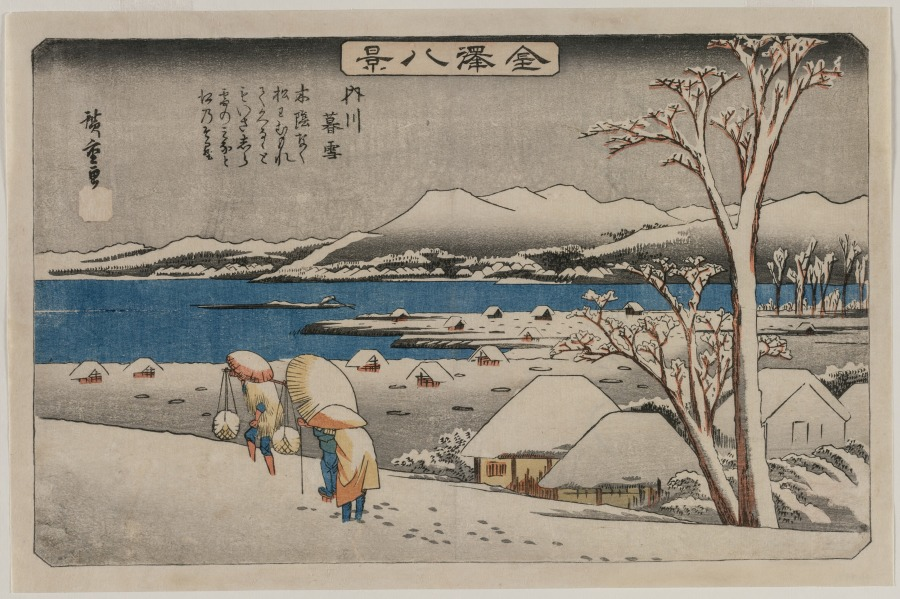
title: Evening Snow at Uchikawa, from the series Eight Views of Kanazawa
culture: Japan, Edo period (1615–1868)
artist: Utagawa Hiroshige (Japanese, 1797–1858)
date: 1835–36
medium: color woodblock print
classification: Print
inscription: Signature: Hiroshige ga Artist Seal: Ichiryusai